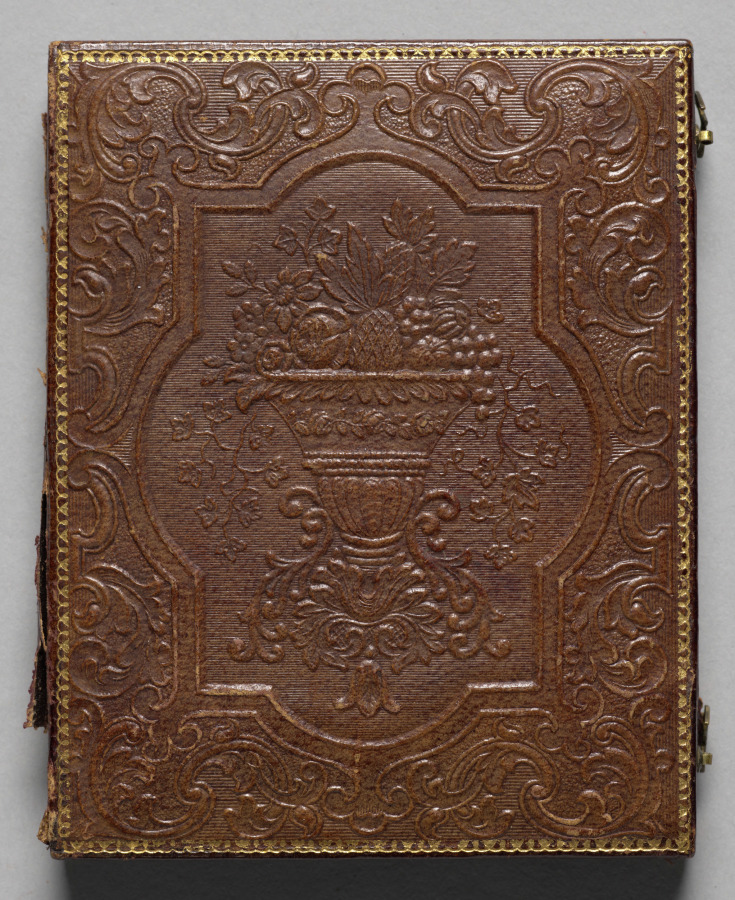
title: Cyrus B. Hills, Postmaster, Arlington, Vermont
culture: America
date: c. 1852–53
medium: daguerreotype, quarter plate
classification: Photograph